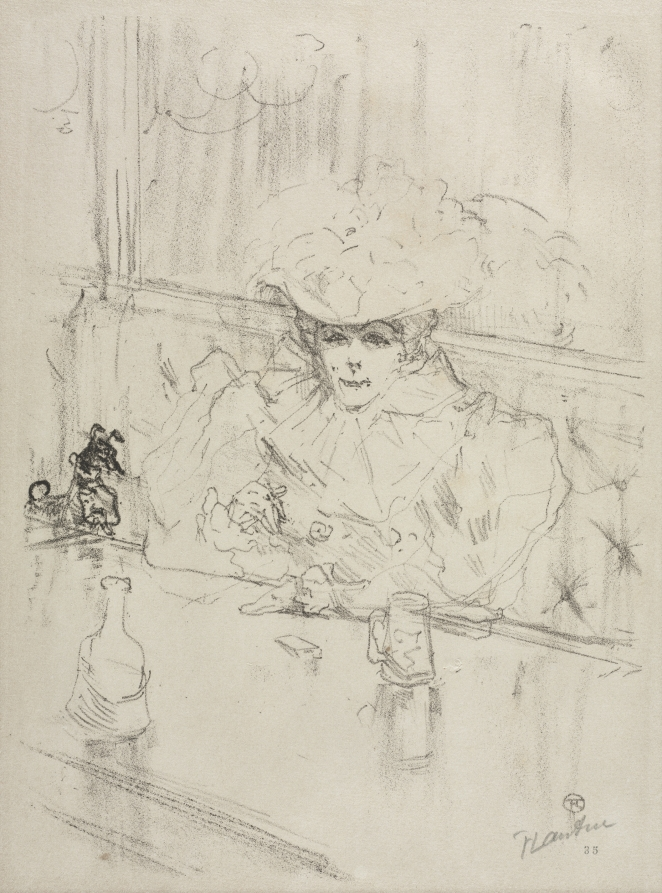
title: Au Hanneton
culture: France, 19th century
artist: Henri de Toulouse-Lautrec (French, 1864–1901)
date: 1898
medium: lithograph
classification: Print